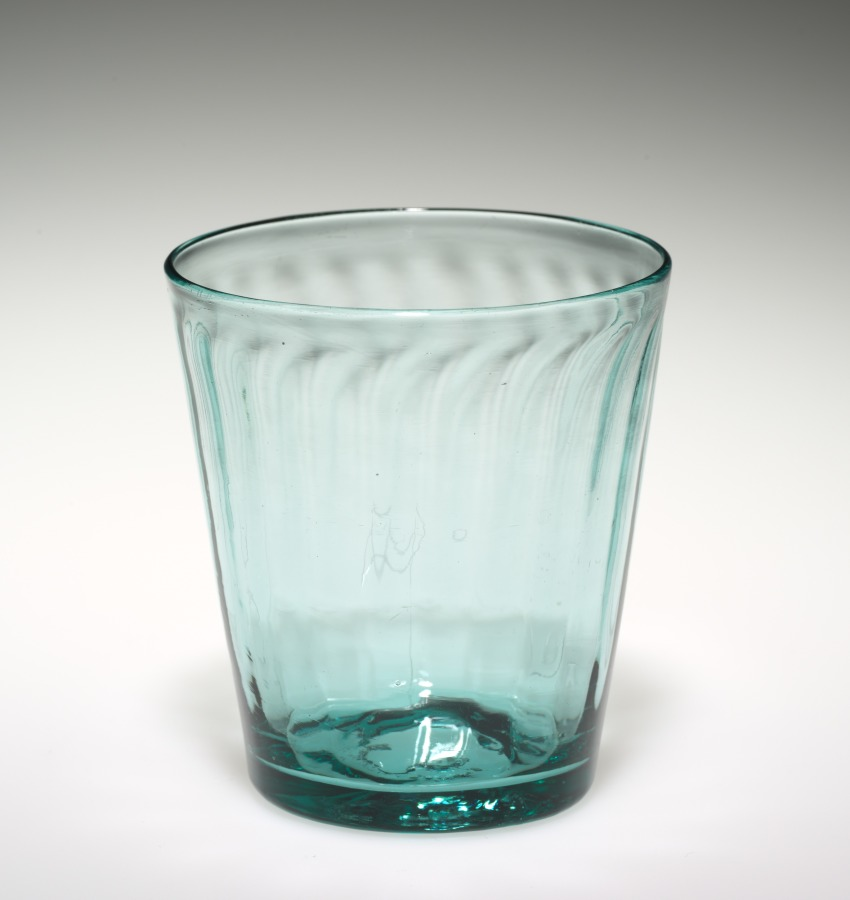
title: Tumbler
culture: America, Zanesville, 19th century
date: 1800–1850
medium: glass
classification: Glass